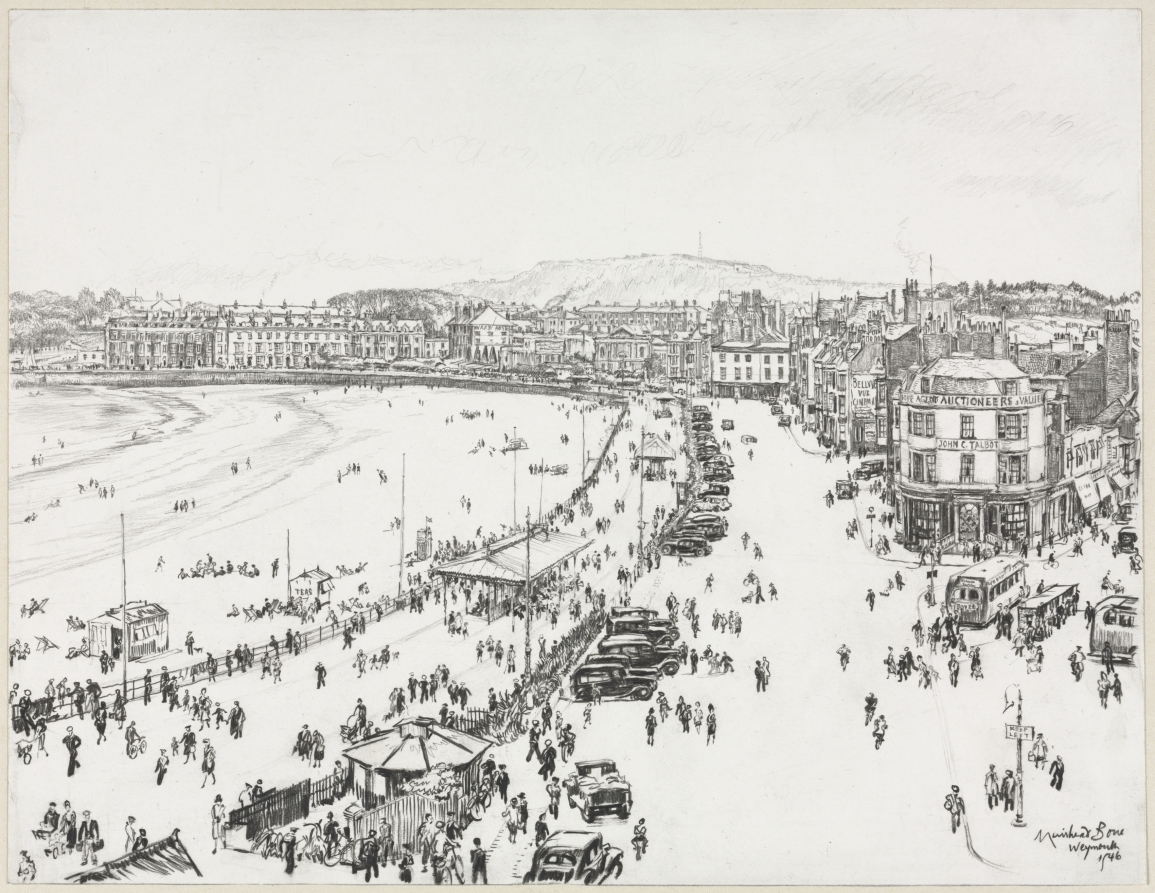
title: Weymouth and Distant Portland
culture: England, 20th century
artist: Muirhead Bone (British, 1876–1953)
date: 1946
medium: colored pencil and ink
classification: Drawing